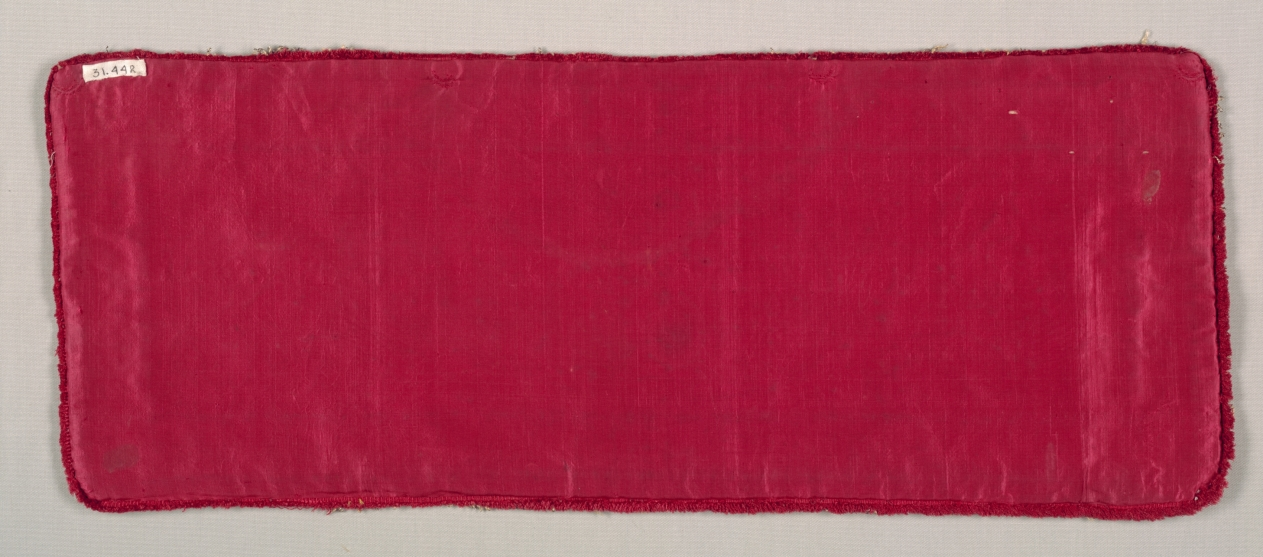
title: Apparel from a Dalmatic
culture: Italy, first half of the 16th century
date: 1500–1550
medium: Plain-weave linen with silk and metal thread embroidery; or nué (shaded gold)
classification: Embroidery